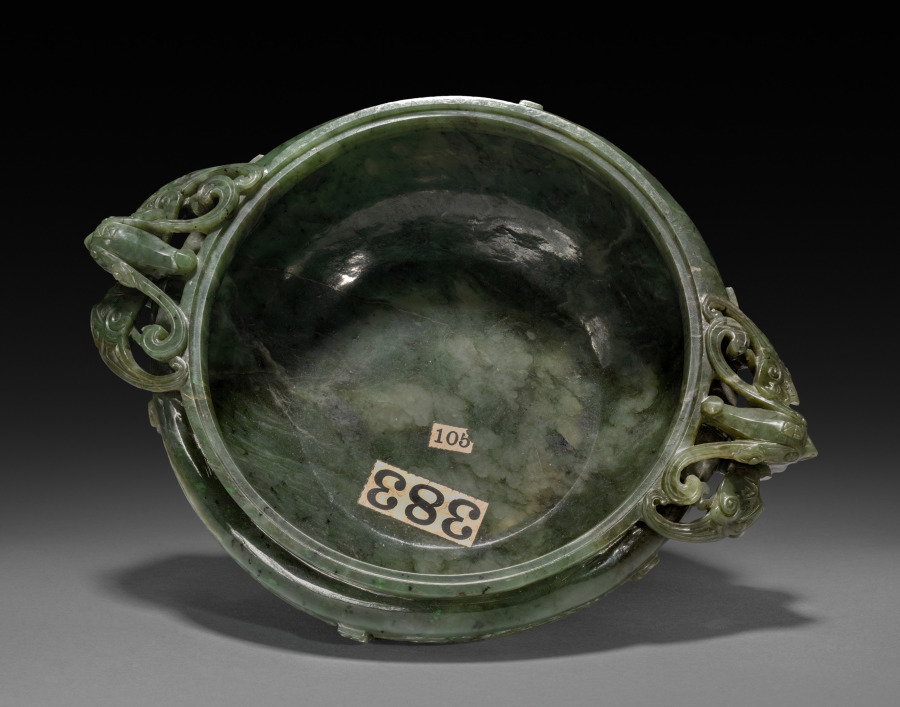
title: Koro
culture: China, Qing dynasty (1644–1911), Qianlong reign (1736–95)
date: 1736–95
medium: jade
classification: Jade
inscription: Qianglong mark on base